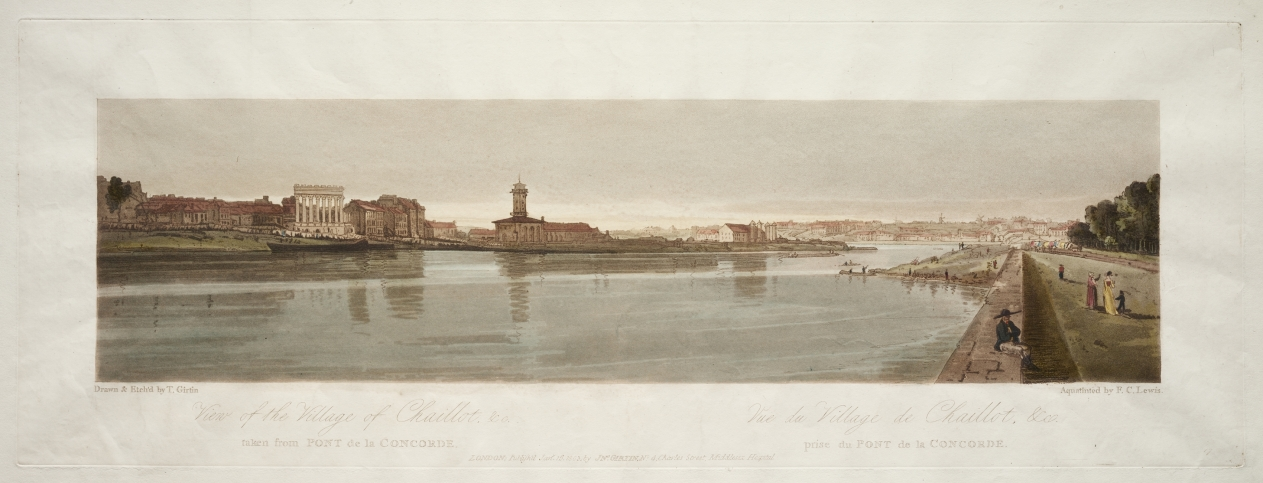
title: A Selection of Twenty of the Most Picturesque Views in Paris: View of the Village of Chaillot, &c Taken from Pont de la Concorde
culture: England, 19th century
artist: Thomas Girtin (British, 1775–1802)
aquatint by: Frederick Christian Lewis (British, 1779–1856)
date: 1803, printed 1810 or after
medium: softground etching and aquatint printed in brown, hand-colored with watercolor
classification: Print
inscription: In plate; Drawn & Etch'd by Thos Girtin; Aquatinted by F. C. Lewis; LONDON: Pubd Jany 16, 1803 by John Girtin, No. I, Little Newport Street, Gerrard Street, Soho.